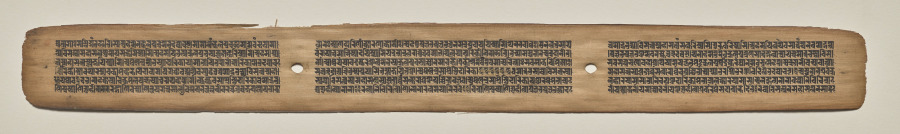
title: Text, folio 178 (recto), from a Manuscript of the Perfection of Wisdom in Eight Thousand Lines (Ashtasahasrika Prajnaparamita-sutra)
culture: Eastern India, Bihar, Vikramashila Monastery. Painting: Nepal, Kathmandu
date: Sunday, September 14, 1119 (year 239 of the Newar Samvat in the month of Ashvina)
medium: gum tempera and ink on palm leaves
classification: Painting